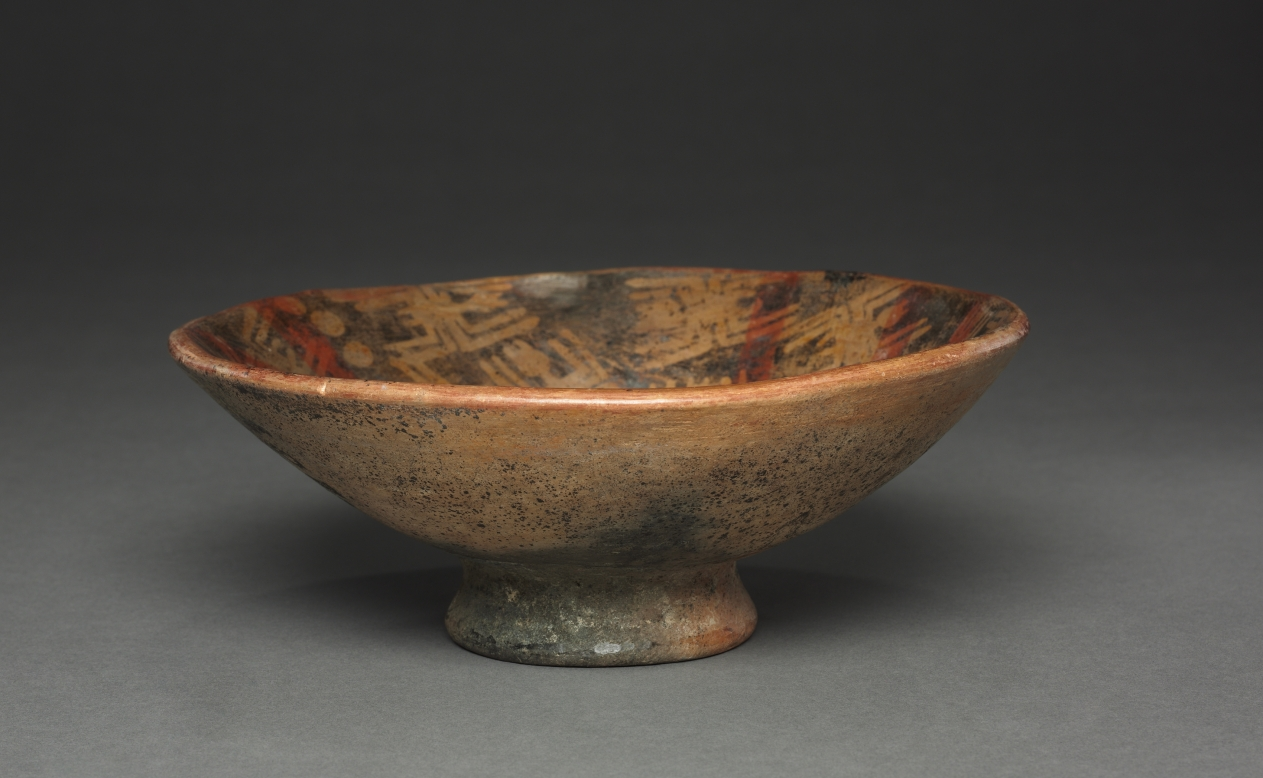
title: Bowl with Spider Decoration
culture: Colombia, Highland Nariño region, Piartal style, 8th-13th Century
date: c. 750–1250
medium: ceramic, slip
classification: Ceramic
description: In the Nariño region of southwestern Colombia, the dead were buried in shaft tombs, the most elaborate up to sixty feet deep and furnished with offerings such as these bowls. Colombian ceramics are not much studied and little can be said about their imagery, which reveals a keen interest in geometric abstraction. Depicted here are a row of figures with thatch-roofed huts, humans attacked by birds, and spiders.